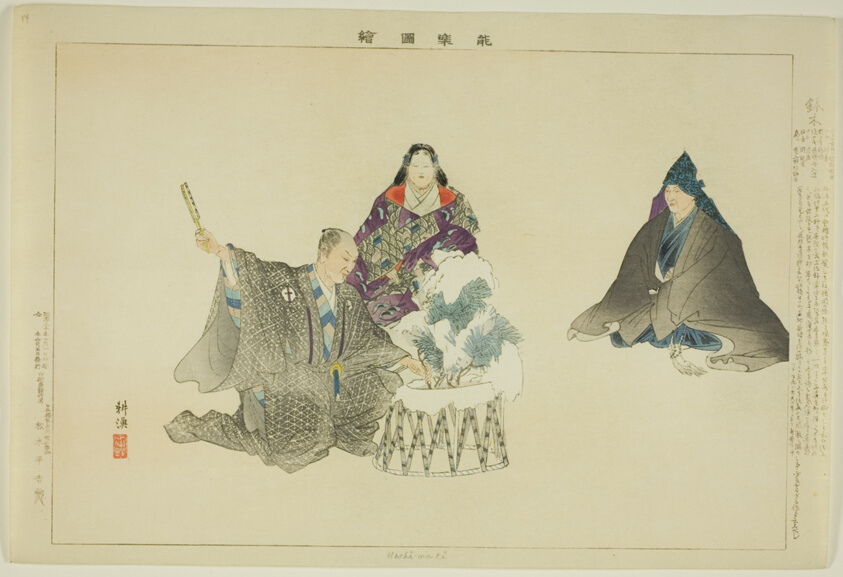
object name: Print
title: Hachi-maki, from the series "Pictures of No Performances (Nogaku Zue)"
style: Japanese (culture or style)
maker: Tsukioka Kogyo; Japanese, 1869-1927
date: 1898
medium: Color woodblock print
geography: Japan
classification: woodblock print; print; asian art